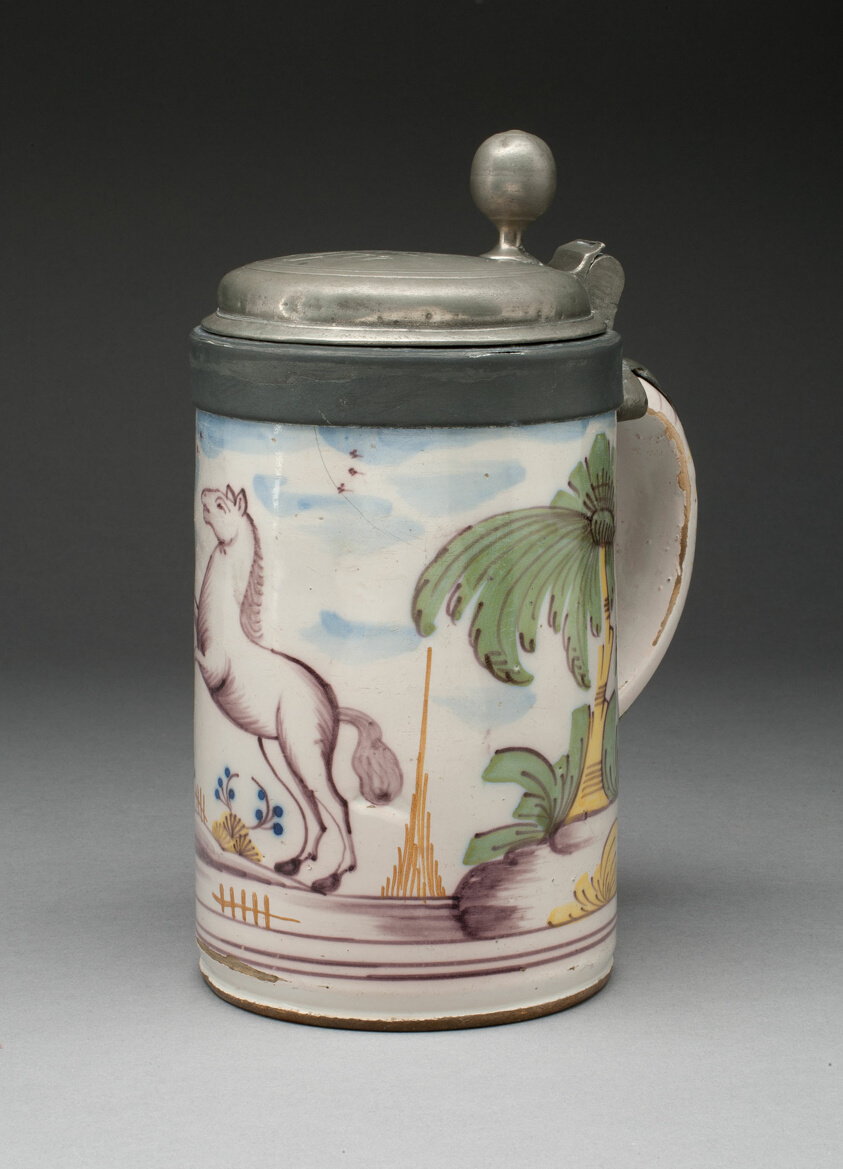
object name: Ceramics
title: Tankard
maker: Germany, Magdeburg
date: c. 1777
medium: Tin-glazed earthenware (faience) and pewter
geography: Magdeburg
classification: drinking vessel; tableware; porcelain; european decorative arts; ceramics